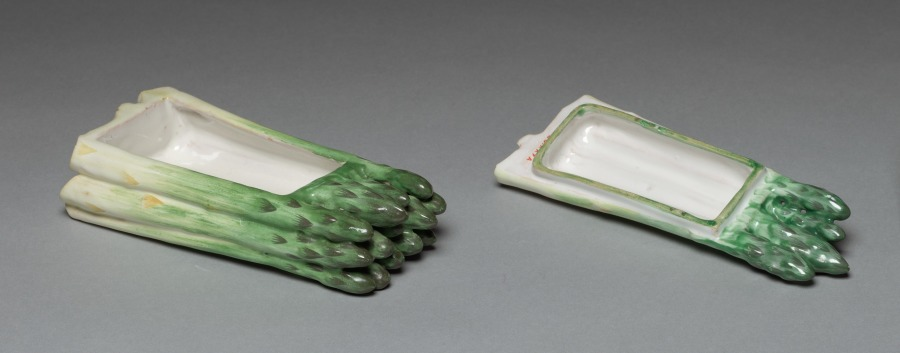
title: Box in the Form of Asparagus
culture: France, Sceaux(?), 18th century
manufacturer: probably by Sceaux Factory (French, active 1748–66)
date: c. 1765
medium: tin-glazed earthenware (faience) with enamel decoration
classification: Ceramic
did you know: Placed upon the dinner table, this container's lid might be lifted to reveal steaming asparagus. Imagine a wealthy 18th-century dining room with flickering candles, whimsical sculptures, and dishes like this decorating the table.